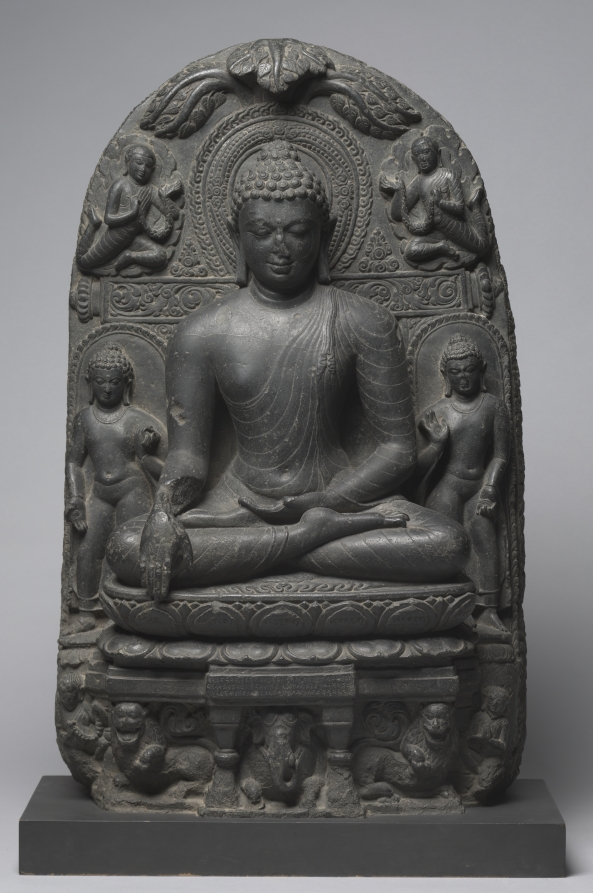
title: Buddha Calling on Earth to Witness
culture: Northeastern India, Bihar, Tetravan, Pala Period (750-1197)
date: 800s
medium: chloritic schist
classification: Sculpture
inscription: Ye dharmā hetu prabhavā tesā hetu tathāgata hya vadat...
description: This sculpture is one of a series that depict the Buddha at different scenes in his life. Here, he is at Bodhgaya, the place where he achieved enlightenment. At the top of the composition are the branches of the ficus tree with its heart-shaped leaves, under which he achieved enlightenment. His hand gesture indicates that he is calling upon the goddess of the earth to witness the moment. During the Pala period of the eighth through 12th centuries in medieval India, Buddhism dominated and flourished in major monastic universities. After the fall of the Pala dynasty, the numerous battles between small kingdoms vying for power caused the destruction of the Buddhist monasteries, and Buddhist monks fled with texts and movable art to Nepal, Tibet, and Southeast Asia, so that by the 14th century, Buddhism was eradicated in India.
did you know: The donors kneel at the lower corners.